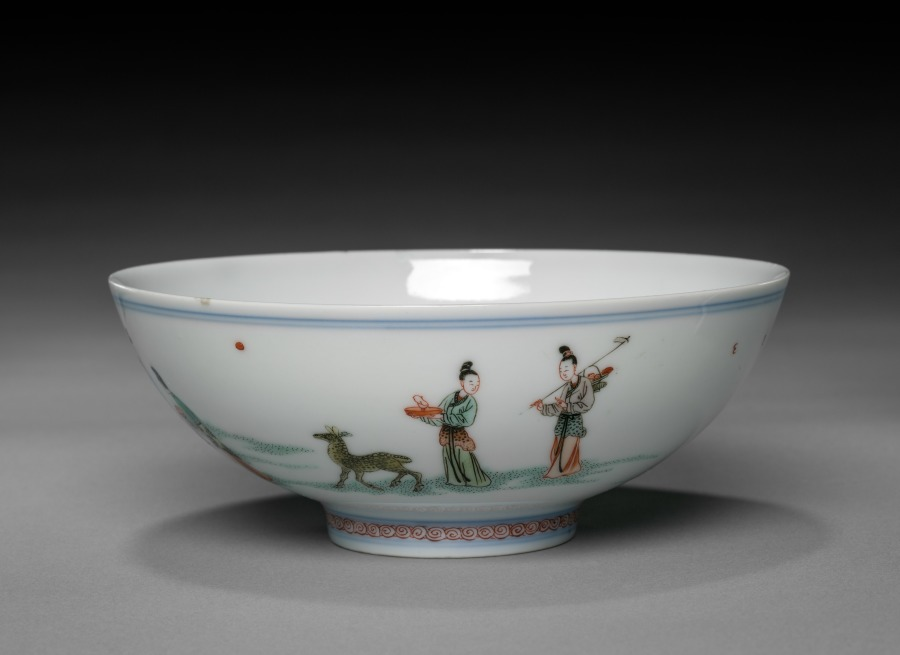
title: Bowl with Xiwangmu and Attendants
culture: China, Jiangxi province, Jingdezhen, Qing dynasty (1644-1911), Kangxi reign (1662-1722), but Chenghua mark (1465-87)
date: 1662–1722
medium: porcelain with famille verte overglaze enamel decoration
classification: Ceramic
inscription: 大明成化年製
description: Xiwangmu is the name for the Queen Mother of the West, an ancient Chinese goddess.